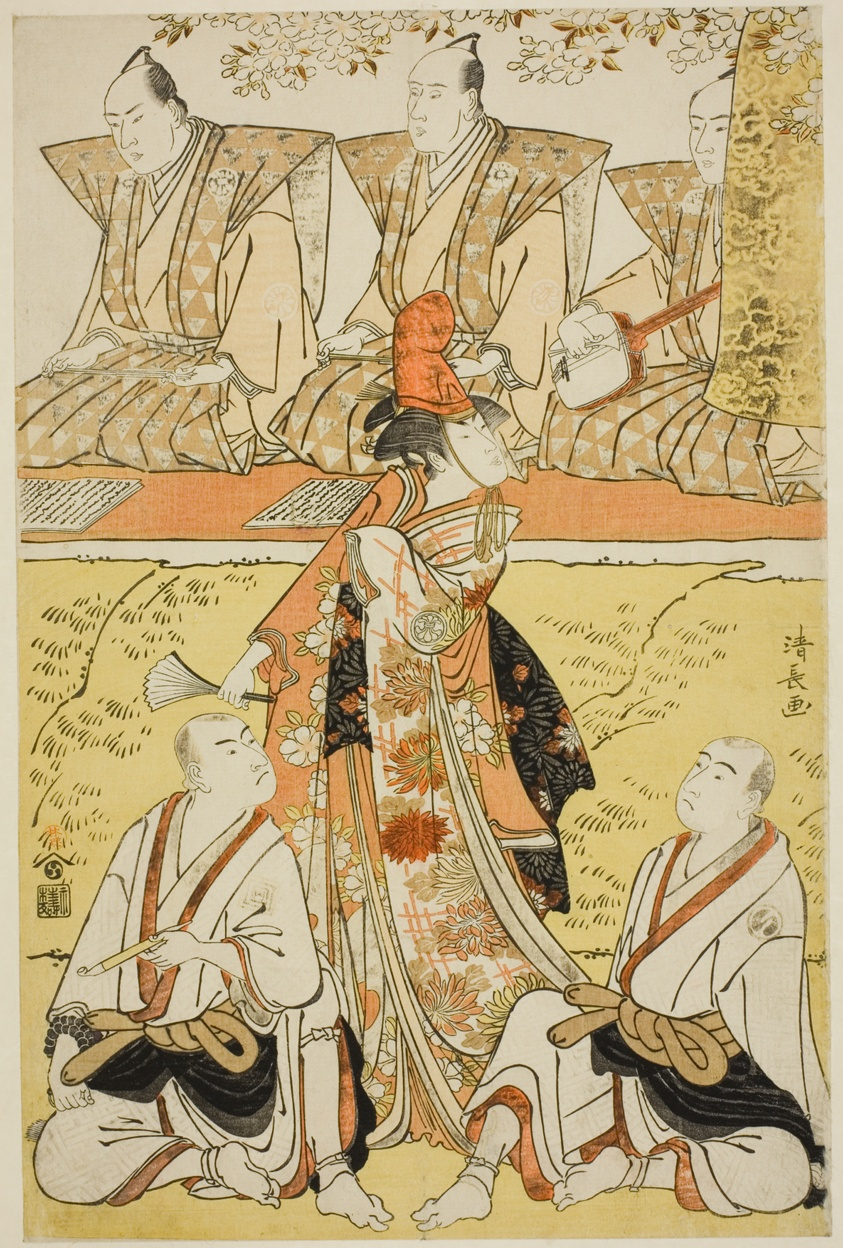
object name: Print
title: The Actors Segawa Kikunojo III as Koito, Sawamura Sojuro III as the monk Sainenbo, and Ichikawa Monnosuke II as the monk Renseibo, in the shosa "Mata Saku Hana Museume Dojoji," performed at the Nakamura Theater in the fourth month, 1783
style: Japanese (culture or style)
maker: Torii Kiyonaga (Japanese, 1752-1815)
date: 1783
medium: Color woodblock print; oban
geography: Japan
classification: woodblock print; print; asian art